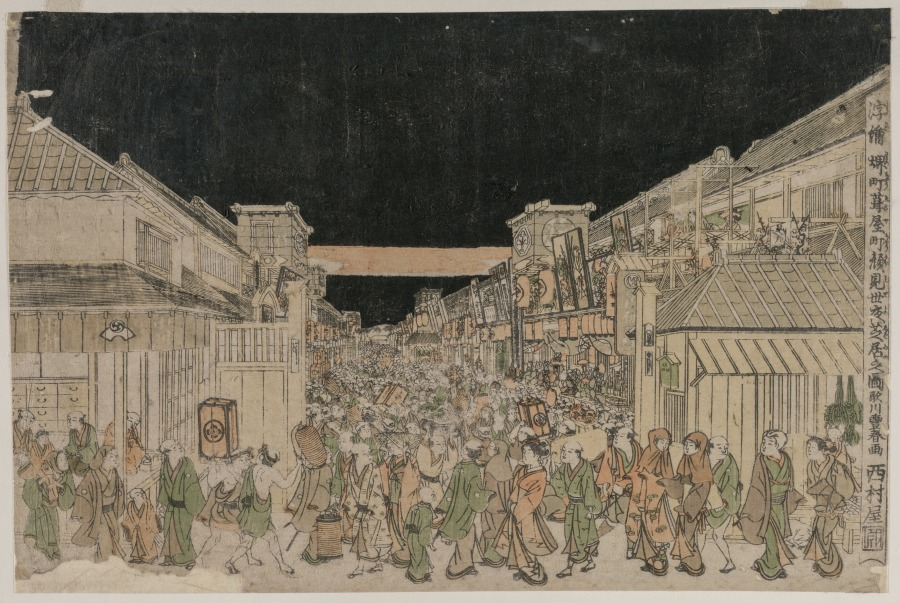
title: Night Scene, Street of Theatres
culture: Japan, Edo period (1615–1868)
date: late 1700s-early 1800s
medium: color woodblock print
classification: Print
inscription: signed Toyoharu ga; publisher's seal below